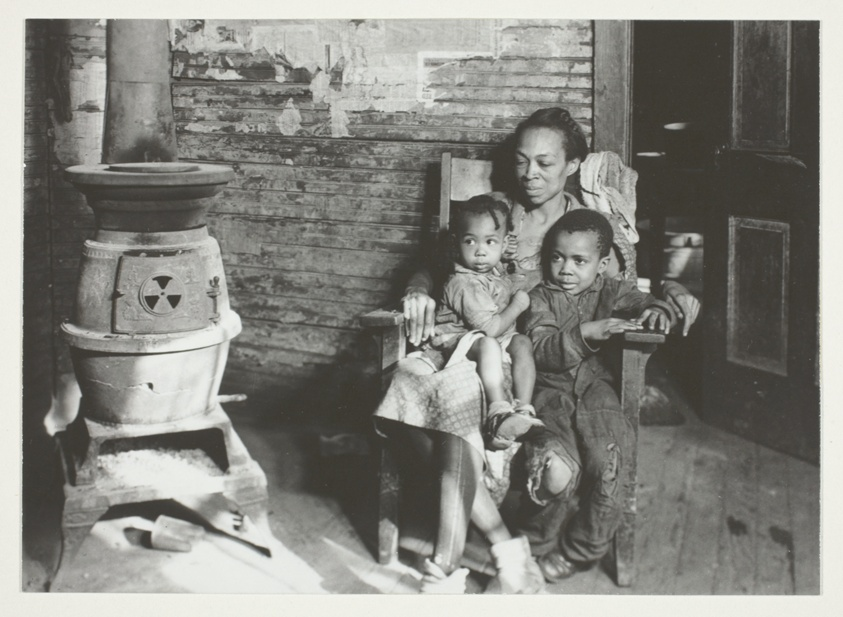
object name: Photograph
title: Untitled, from the series "Southern Negroes"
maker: Lewis Wickes Hine (American, 1874–1940)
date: c. 1920, printed later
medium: Gelatin silver print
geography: United States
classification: gelatin silver (developing-out-paper) pr; photographic process; photography; photograph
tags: Collected by Hugh Edwards